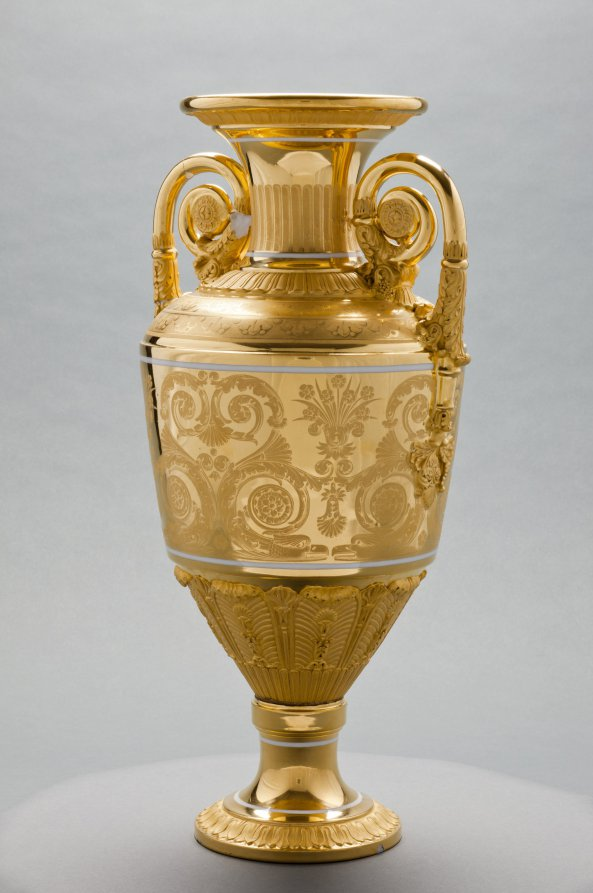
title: Vase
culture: Russia, St. Petersburg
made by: St. Petersburg Imperial Porcelain Factory (Russian)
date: c. 1820–1830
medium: gilt porcelain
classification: Ceramic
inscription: inscribed: "Moreau" in gold near lip.